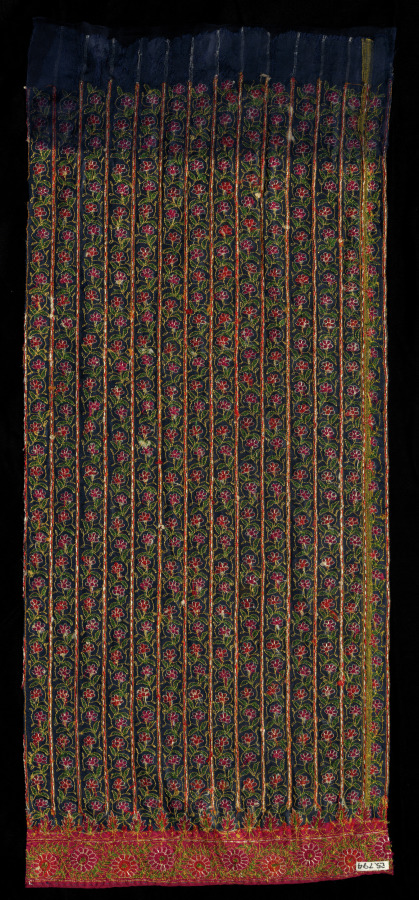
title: Part of a Skirt (Ghaghara)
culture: Western India, Gujarat, possibly Kutch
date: early 1800s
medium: silk satin embroidered with silk in "ari" chain stitch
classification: Embroidery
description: Brightly colored floral vine patterns were embroidered using fine chain stitches. Since there are continuous, unbroken lines of stitches on the back side of the cloth, they were created using a hooked awl, which is a much faster process than embroidering with a straight needle. This type of embroidery is known as ari work, which flourished in Gujarat during the 19th century.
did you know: The renowned art historian A. K. Coomaraswamy (1877–1947) gave another section of this skirt to the Victoria and Albert Museum in London, UK (IM.108-1912).